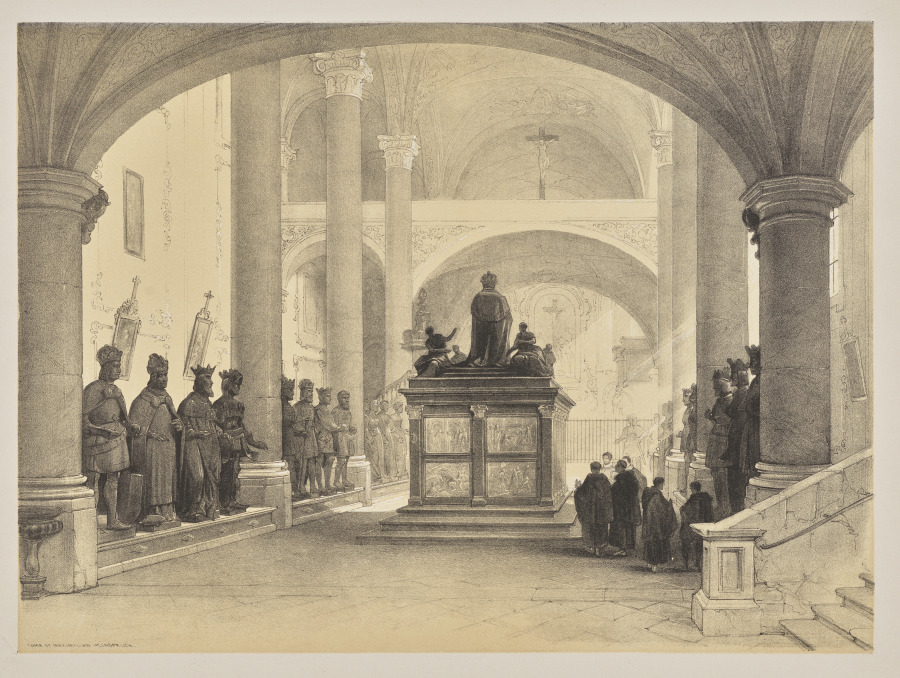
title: Sketches in Belgium and Germany, First Series, Tomb of Maximilian 1st, Innsbruck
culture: England, 19th century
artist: Louis Haghe (British, 1806–1885)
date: 1845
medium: lithograph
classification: Print